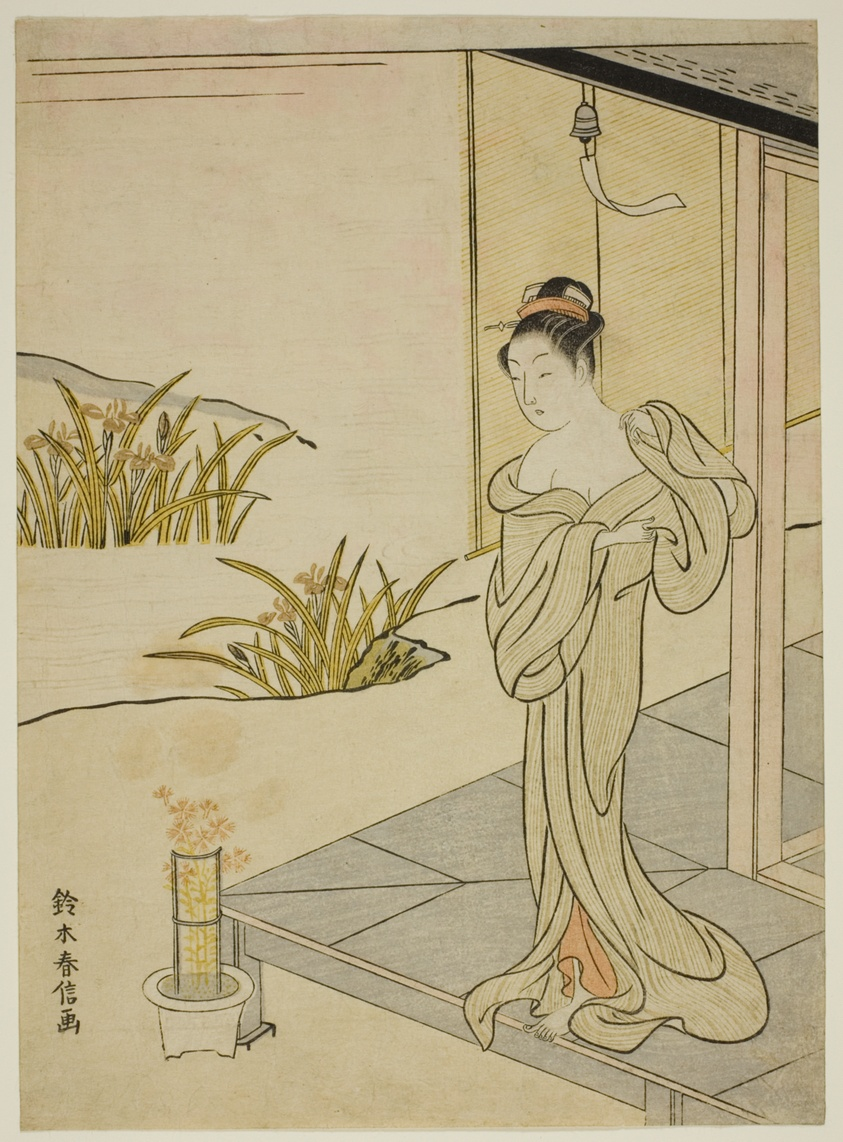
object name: Print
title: Summer, from the series "New Versions of Flowers of the Four Seasons (Shinpan furyu shiki no hana)"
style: Japanese (culture or style)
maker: Suzuki Harunobu 鈴木 春信; Japanese, 1725 (?)-1770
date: c. 1767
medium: Color woodblock print; chuban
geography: Japan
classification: woodblock print; print; asian art